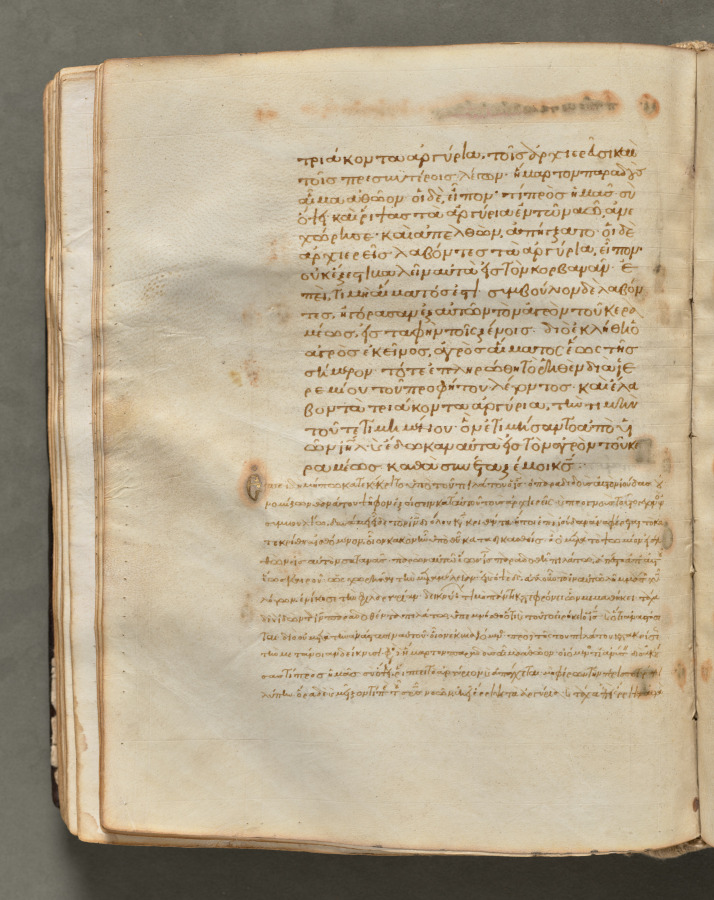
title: Text, folio 122 (verso), from a Gospel Book with Commentaries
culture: Byzantium, Constantinople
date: c. 1000–1100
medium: ink, tempera, and gold on vellum; leather binding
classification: Bound Volume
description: Each of the four gospels in this book opens on a page with brilliantly illuminated borders depicting the author of the text as well as birds-principally peacocks, symbols of the immortality of the soul-and fountains, representing the fountain of life and the salvation of the soul. This volume consists of 428 leaves with texts in Greek. Its level of sophistication suggests that it was probably written and decorated in a monastery in Constantinople.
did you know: Gospel Books were carried in procession through Byzantine churches.